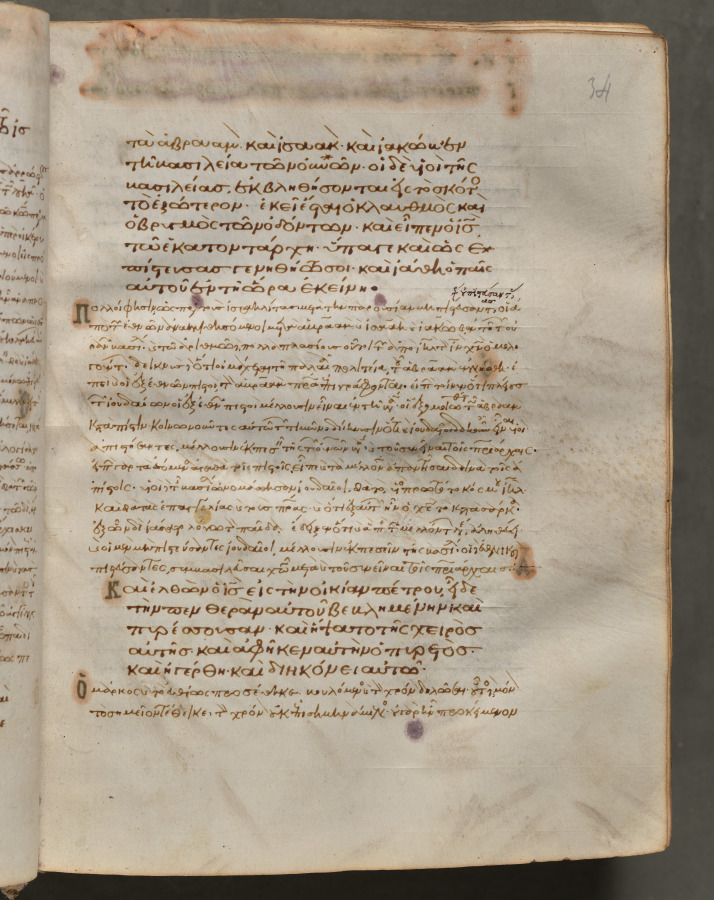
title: Text, folio 34 (recto), from a Gospel Book with Commentaries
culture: Byzantium, Constantinople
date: c. 1000–1100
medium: ink, tempera, and gold on vellum; leather binding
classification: Bound Volume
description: Each of the four gospels in this book opens on a page with brilliantly illuminated borders depicting the author of the text as well as birds—principally peacocks, symbols of the immortality of the soul—and fountains, representing the fountain of life and the salvation of the soul. This volume consists of 428 leaves with texts in Greek. Its level of sophistication suggests that it was probably written and decorated in a monastery in Constantinople.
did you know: Gospel Books were carried in procession through Byzantine churches.